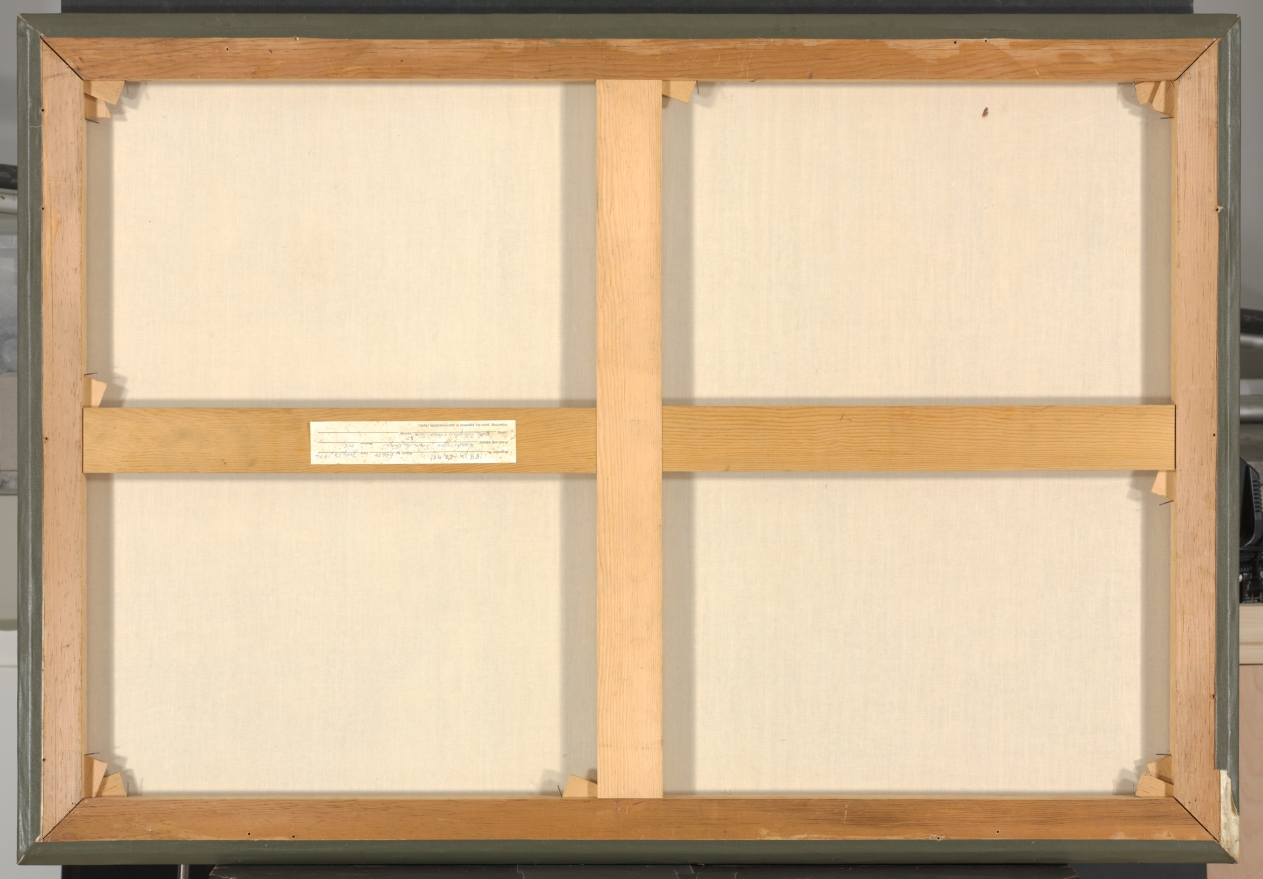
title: Sleeping Peasants near Fields (Parable of the Weeds)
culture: Netherlands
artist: Simon de Vlieger (Dutch, 1601–1653)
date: 1650–53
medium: oil on canvas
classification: Painting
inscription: Signed lower left: S. DE VLIEGER 16[5...]"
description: During the 1600s Protestant leaders denounced visual representations, in a belief that a strict understanding of the scriptures was the only way to achieve salvation. As a result, Protestants did not generally commission religious images. However, where religious painting did appear, they often depicted verses from the Bible with strict didactic values, such as Sleeping Peasants near Fields (Parable of the Weeds). The subject of this painting is the Parable of the Weeds from Matthew 13:24-30. Simon de Vlieger has illustrated the point in the story where the peasants sleep after sowing good seeds, and the enemy, depicted here as a satyr, mixes in bad seeds in the fields as well. When the weeds begin to grow, confused, the peasants ask the farmer if they should remove the seeds. The farmer replies that they should let the weeds and wheat grow together, and he will destroy the weeds after the harvest. The lesson of the story is that good and evil people often mix together; but in the end the pious will prevail and the wicked will be destroyed.